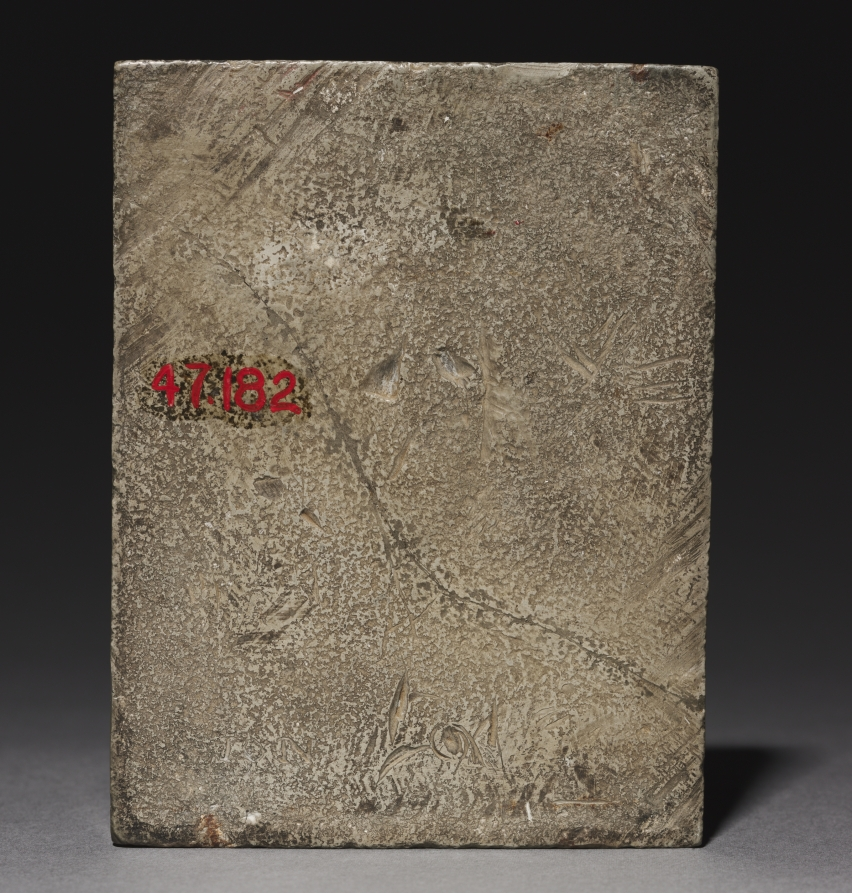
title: Christ in the Garden of Gethsemane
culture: Germany, Augsburg, 16th century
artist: Hans Daucher (German, c. 1485–after 1538)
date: 1500s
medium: Kelheim stone (fine-grained limestone)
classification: Sculpture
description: The artist made a mold from this relief in order to cast reproductions in metal.